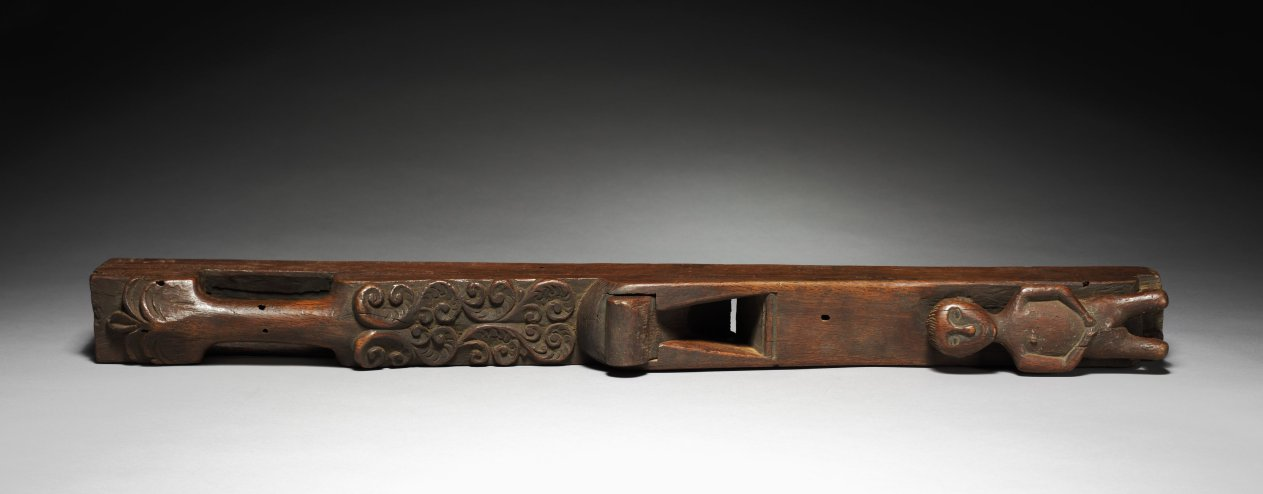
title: Plane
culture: Germany or Italy, 17th century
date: 1600s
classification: Tool